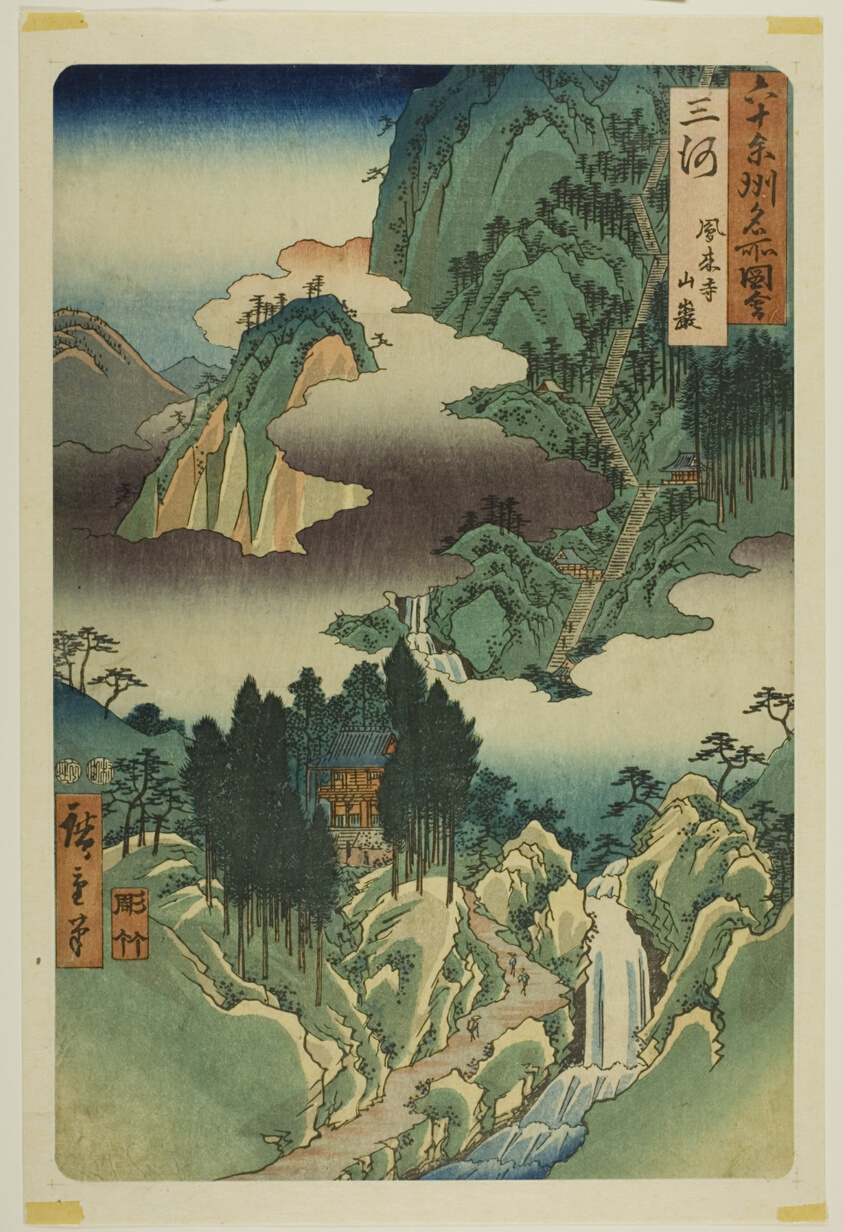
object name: Print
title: Mikawa Province: Horai Temple in the Mountains (Mikawa, Horaiji sangan), from the series "Famous Places in the Sixty-odd Provinces (Rokujuyoshu meisho zue)"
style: Japanese (culture or style)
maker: Utagawa Hiroshige 歌川 広重; Japanese, 1797–1858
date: 1853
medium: Color woodblock print; oban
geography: Japan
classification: woodblock print; print